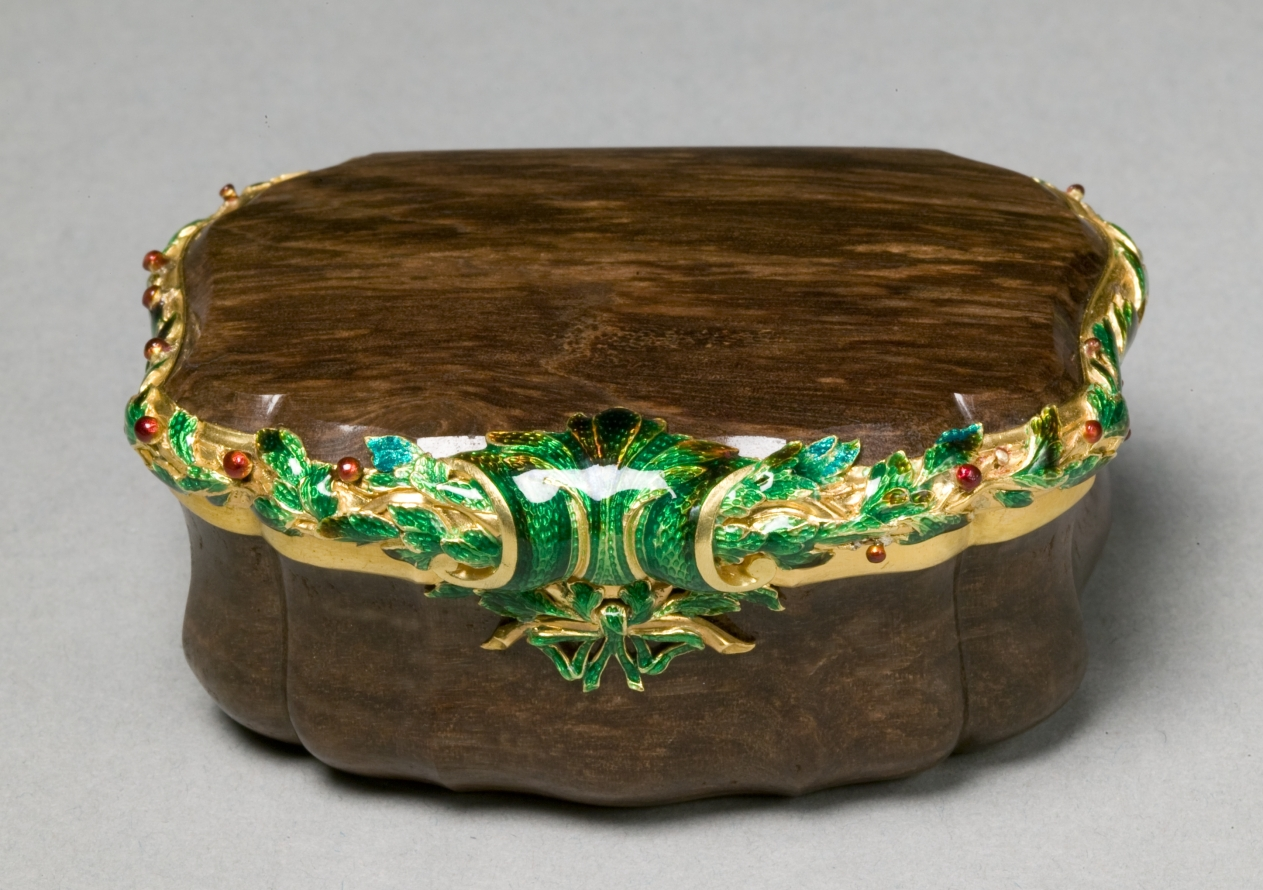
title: Snuff Box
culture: Germany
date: c. 1840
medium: mocha agate with 18 kt. gold mounts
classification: Miscellaneous